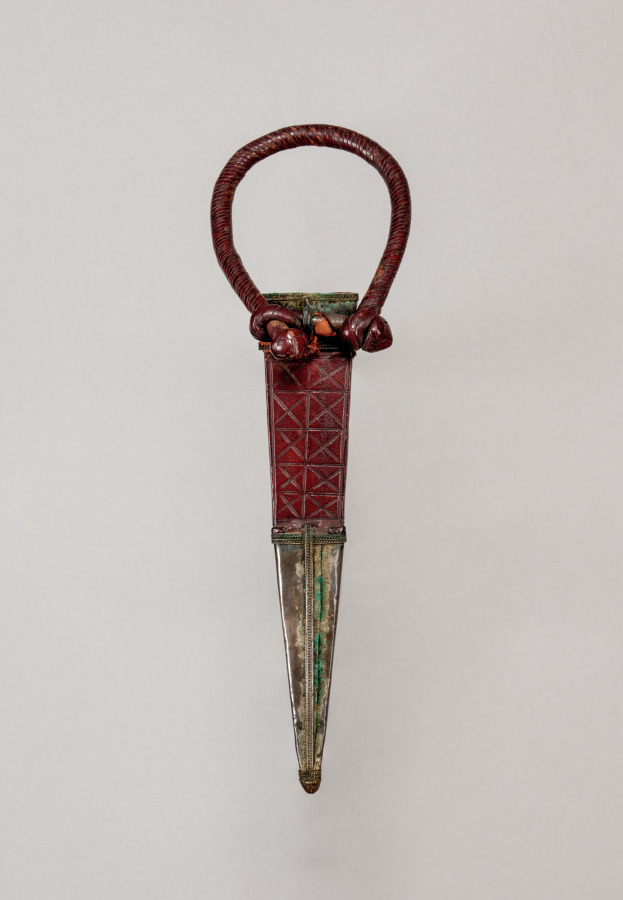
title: Scabbard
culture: Africa, East Africa, Sudan, unknown maker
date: 1880–1910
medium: metal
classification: Arms and Armor